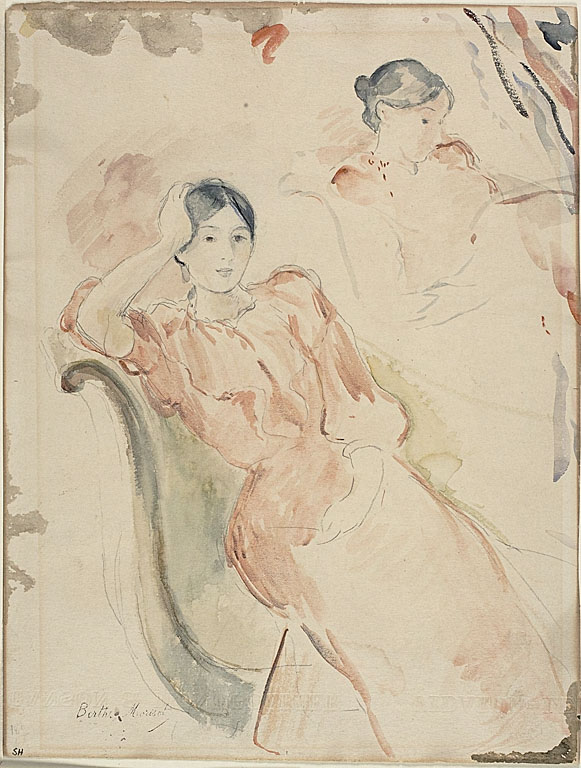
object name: Drawing and Watercolor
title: Jeanne Pontillon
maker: Berthe Morisot (French, 1841-1895)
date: c. 1893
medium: Watercolor, over graphite, on ivory wove paper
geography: France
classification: watercolor; drawings (visual works); prints and drawing